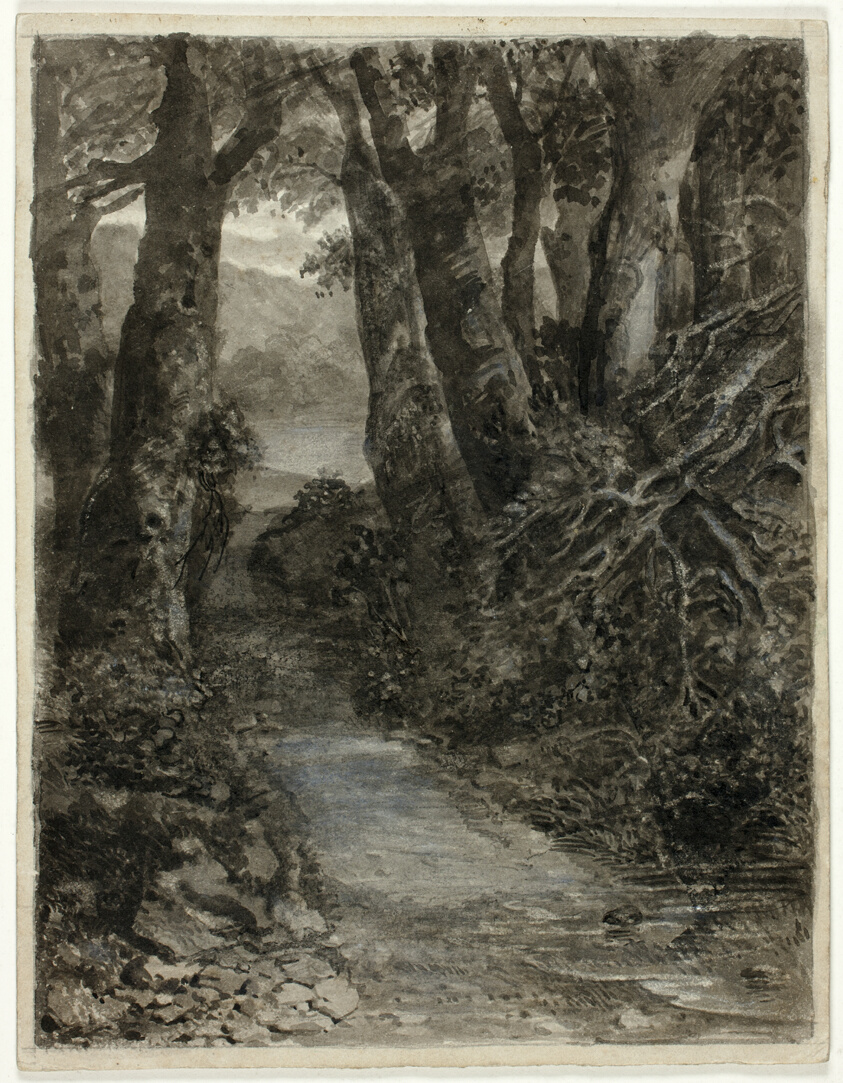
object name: Drawing and Watercolor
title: A Woodland Study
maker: Samuel Palmer (English, 1805-1881)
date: c. 1856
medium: Brush and black and brown washes, with white gouache and scraping, ruled in graphite, on ivory paperboard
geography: England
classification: prints and drawing; drawings (visual works)